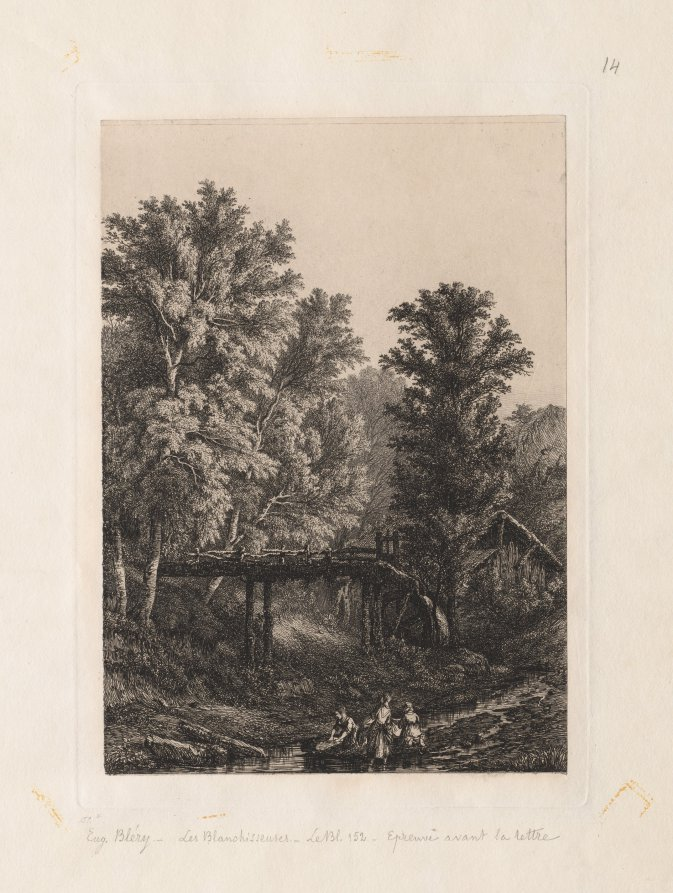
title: The Laundresses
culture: France, 19th century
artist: Eugene Bléry (French, 1805–1886)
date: 1838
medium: etching on chine collé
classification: Print